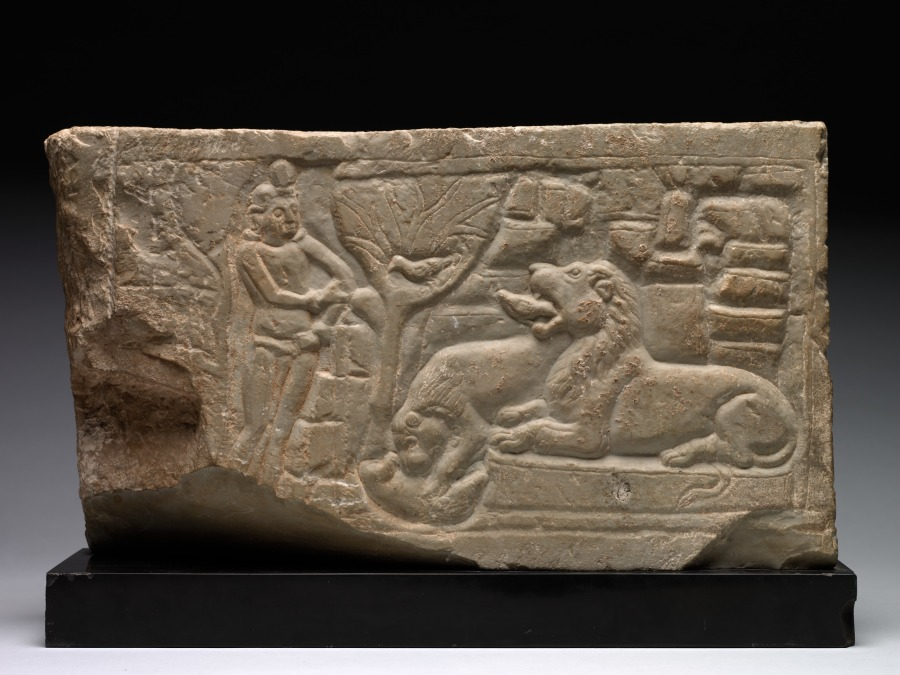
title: Buddha's Previous Life as a Woodpecker: Javasakunda Jataka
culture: Southern India, Andhra Pradesh, possibly Amaravati, Satavahana period (100s BC-AD 200s)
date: c. 175–225 CE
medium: limestone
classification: Sculpture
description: Scenes from the past lives of the Buddha were among the major themes found on early Buddhist monuments. This one exemplifies his acts of kindness and his intelligence in one of his past lives when he was a born as a woodpecker and helped dislodge a bone from a lion's throat.